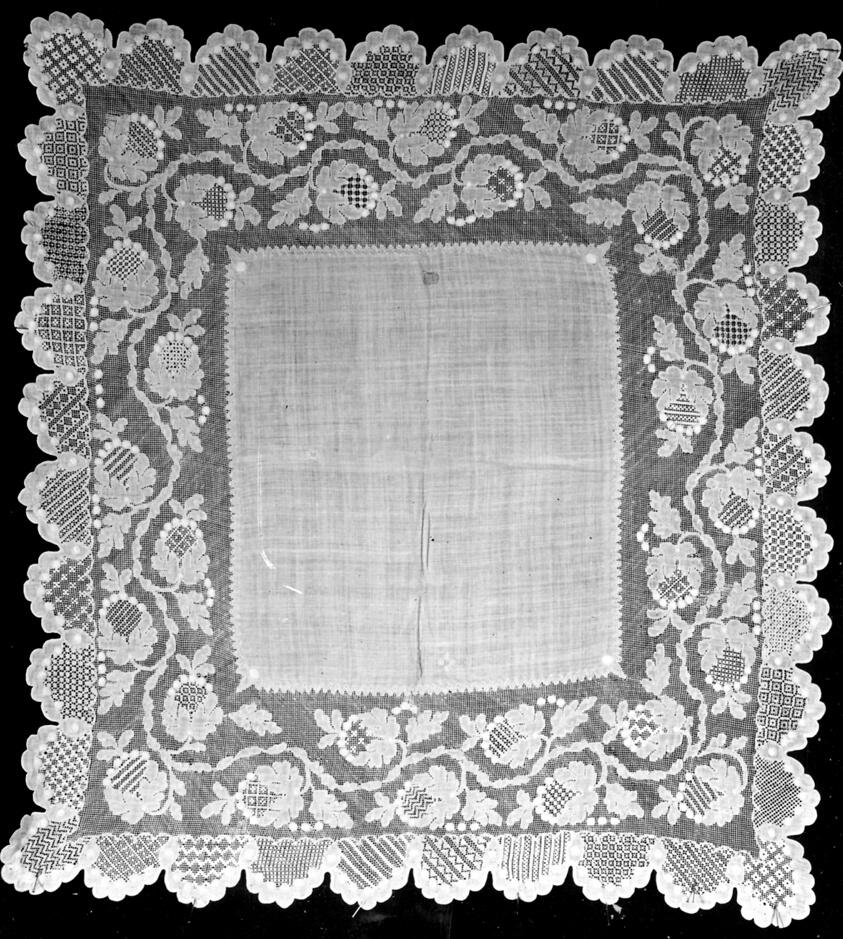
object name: Textile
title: Handkerchief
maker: Spain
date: 19th century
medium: Linen, plain weave, with drawnwork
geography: Spain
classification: textile; needlework (visual works); accessories (object genre); weaving